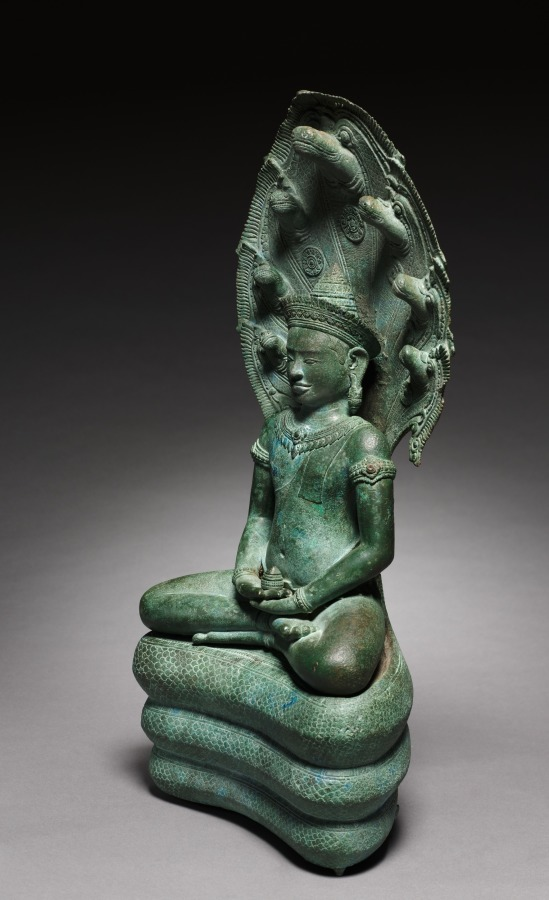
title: Naga-Enthroned Buddha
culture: Cambodia, Angkor, Angkor Wat Period, 12th century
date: 1100s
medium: bronze with traces of gilding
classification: Sculpture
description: Jayavarman VII, who built the great royal temple at Banteay Chhmar, linked himself with the image of the Buddha seated on a serpent, or naga, as the divine form under which he would be honored. During his reign, the naga-enthroned Buddha became a ubiquitous image for veneration, often set up together with Lokeshvara, who was associated with his father, and Prajnaparamita, the form under which his deceased mother was honored. Lokeshvara is the powerful enlightened being of compassion, while Prajnaparmita is the goddess who personifies wisdom. King Jayavarman VII, therefore, presented himself as the enlightened Buddha, the product of the union of Compassion and Wisdom, supported and glorified by the naga, which refers to the Khmer people. Images of the naga-enthroned Buddha have been found at Banteay Chhmar, both in architectural relief sculpture and as icons in the round. After the death of Jayavarman VII, followers of other forms of Buddhism (for example, Theravada) that became prevalent in Cambodia changed the meaning of the naga-enthroned Buddha and reinterpreted the image to refer to a scene from the historical Buddha’s life story in which a serpent protected him from a flood. The crowned and bejeweled aspect of this Buddha, though, indicates that it is another kind of transcendent figure. In his lap his hands are in a posture of meditation, holding what appears to be an offering of ceremonial rice referring to the hope that he will ensure the prosperity of the land.